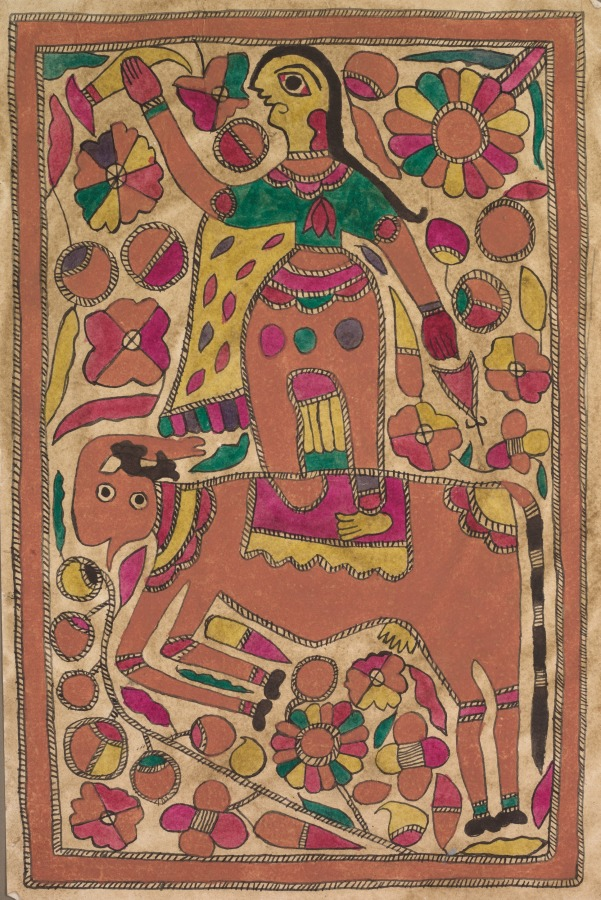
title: Rider and four-legged creature with floral motif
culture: Eastern India, Bihar State, Mithila or Madhubani School, 20th century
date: 1900s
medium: ink and color on paper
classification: Painting